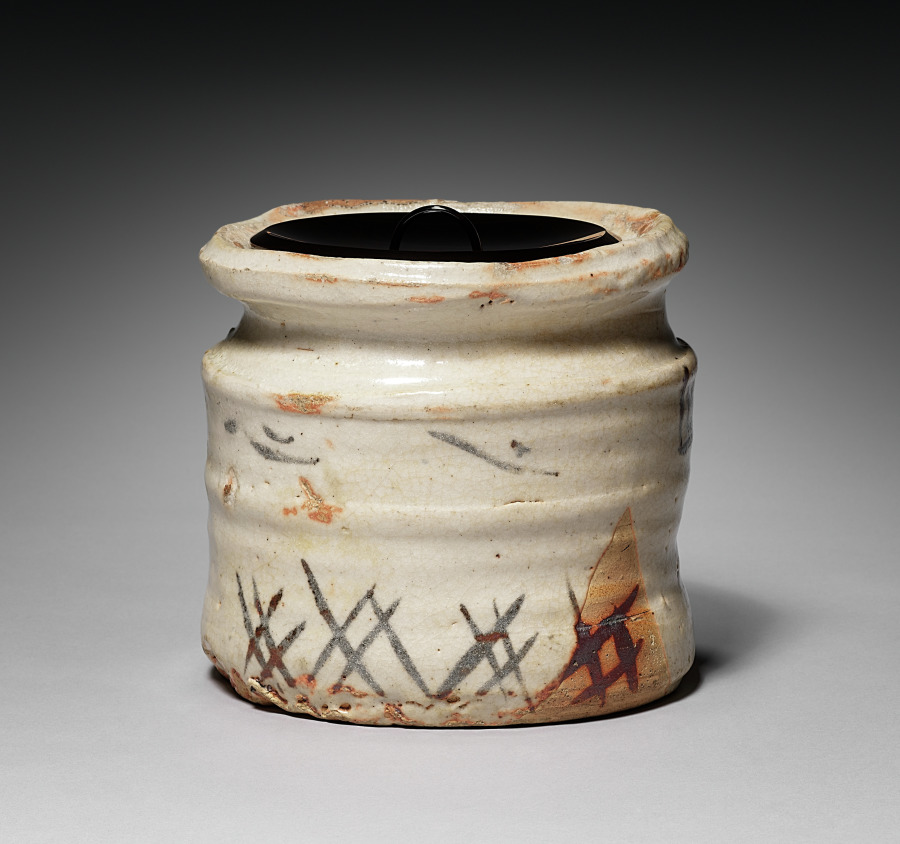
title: Water Container (Mizusashi) with Riverscape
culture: Japan, Momoyama period (1573-1615) to Edo period (1615-1858)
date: late 1500s–early 1600s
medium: Stoneware with underglaze iron oxide slip decoration (Mino ware, Shino type) and lacquer lid (modern replacement)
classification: Ceramic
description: Mizusashi are jars used to hold water for the preparation of tea at tea gatherings. This one was produced in the Mino area of present-day Gifu Prefecture in central Japan. It is called a “picture Shino” (e-shino) mizusashi, as it has an abstracted design on one side, said to resemble an ink painting of reeds and small boats along a riverbank, and a geometric pattern on the other. With its irregular shape and thick, luminous glaze, it is of a variety favored by eminent tea masters of the Momoyama period.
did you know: The water this container held during a tea gathering was used to fill the kama, or iron pot in which the water is heated.